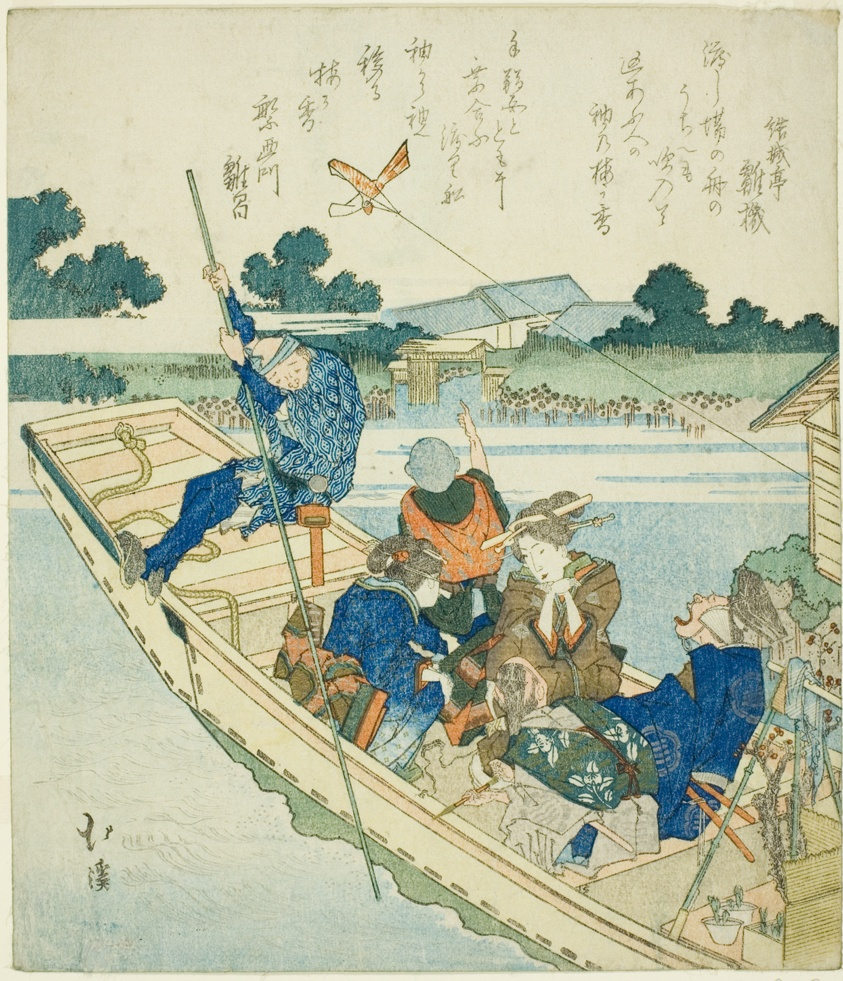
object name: Print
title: Crossing the Sumida River on New Year's Day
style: Japanese (culture or style)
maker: Totoya Hokkei (Japanese, 1780–1850)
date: 1830s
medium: Color woodblock print; shikishiban, surimono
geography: Japan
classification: woodblock print; print; asian art